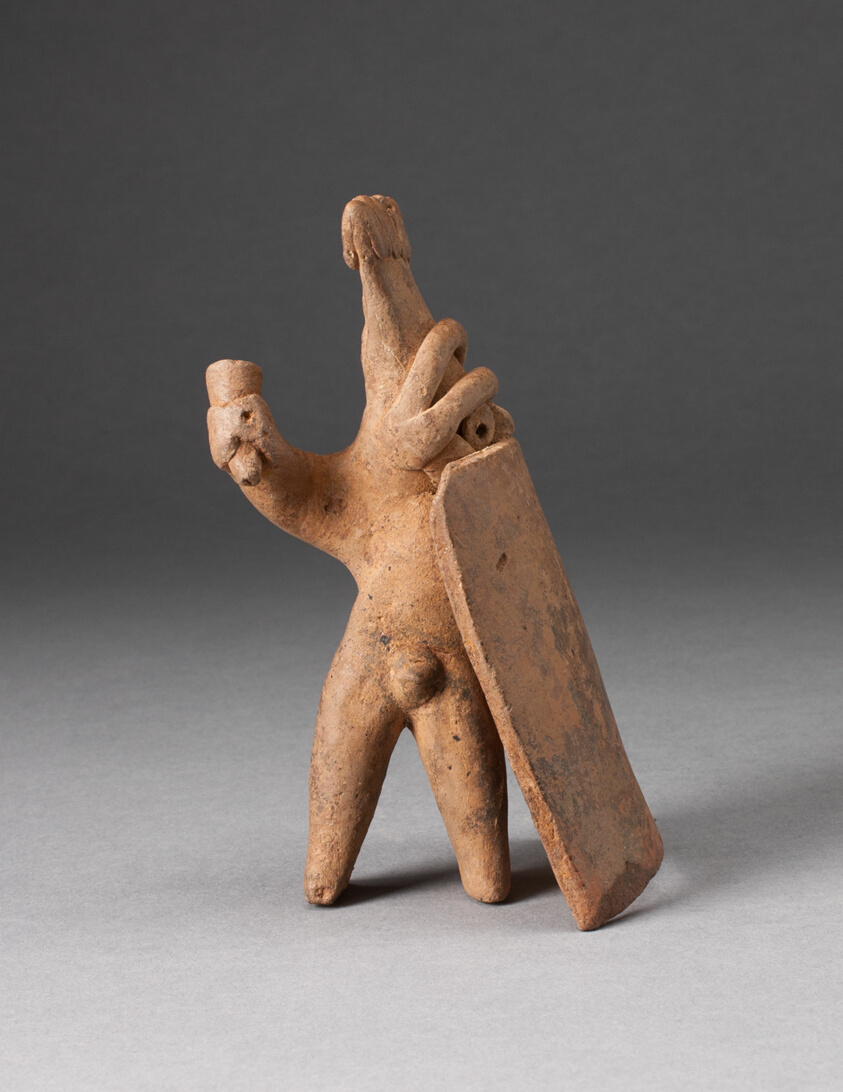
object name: Sculpture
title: Figurine of a Warrior with Square Shield and Weapon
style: colima, mesoamerican, Pre-Columbian, americas, Arts of the Americas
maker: Colima (Colima, Mexico)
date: 200 BC–200 BCE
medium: Ceramic and pigment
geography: Western Mexico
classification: earthenware; ceramics; sculpture; art of the americas